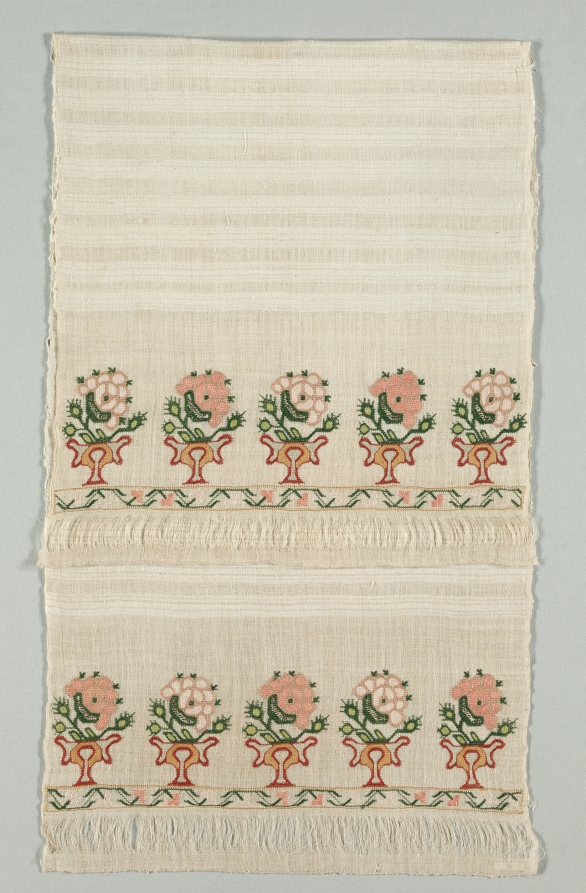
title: Embroidered Towel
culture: Turkey, 19th century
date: 19th century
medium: embroidery: silk thread and tinsel pushed through fabric, bent and pressed into place, on linen tabby ground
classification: Embroidery